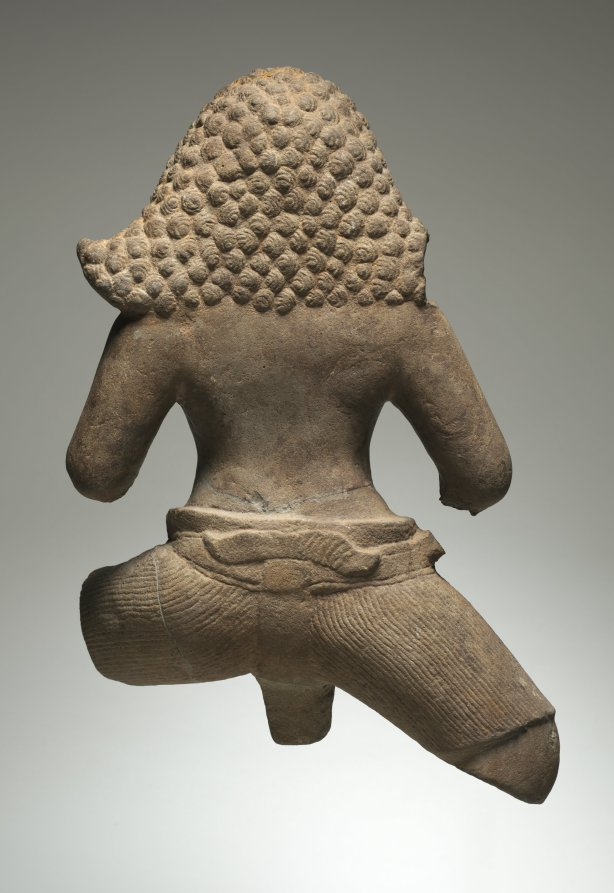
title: Rakshasa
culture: Cambodia, Koh Ker style, 2nd quarter 10th Century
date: 925–950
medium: sandstone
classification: Sculpture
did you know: This sturdy demon has bulging eyes and windblown hair, suggesting Rakshasa was more than a static guardian figure.